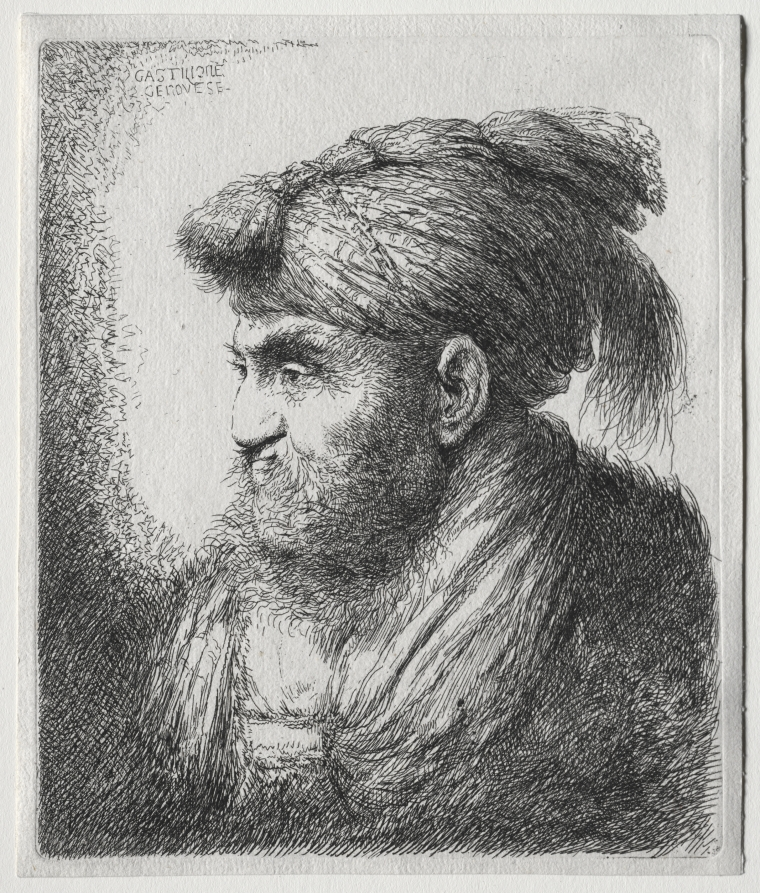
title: The Large Heads of Men in Oriental Headdress: A Man Nearly in Profile and Turned to Left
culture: Italy, 16th century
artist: Giovanni Benedetto Castiglione (Italian, 1609–1664)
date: c. 1650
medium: etching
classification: Print